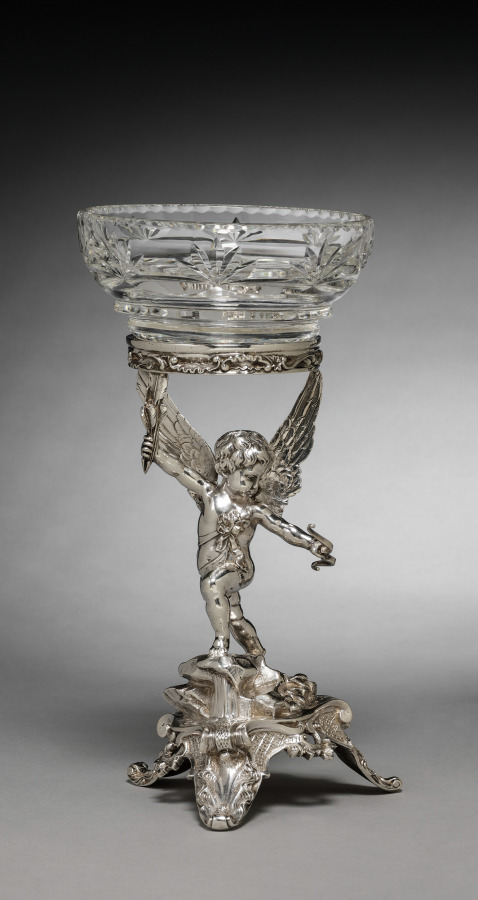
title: Compote and Stand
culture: Russian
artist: House of Fabergé (Russian, 1842–1918)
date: c. 1890–99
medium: silver, glass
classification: Silver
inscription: Inscribed “K. Fabergé” in Cyrillic, surmounted by the double-headed Imperial eagle.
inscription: “88” silver standard